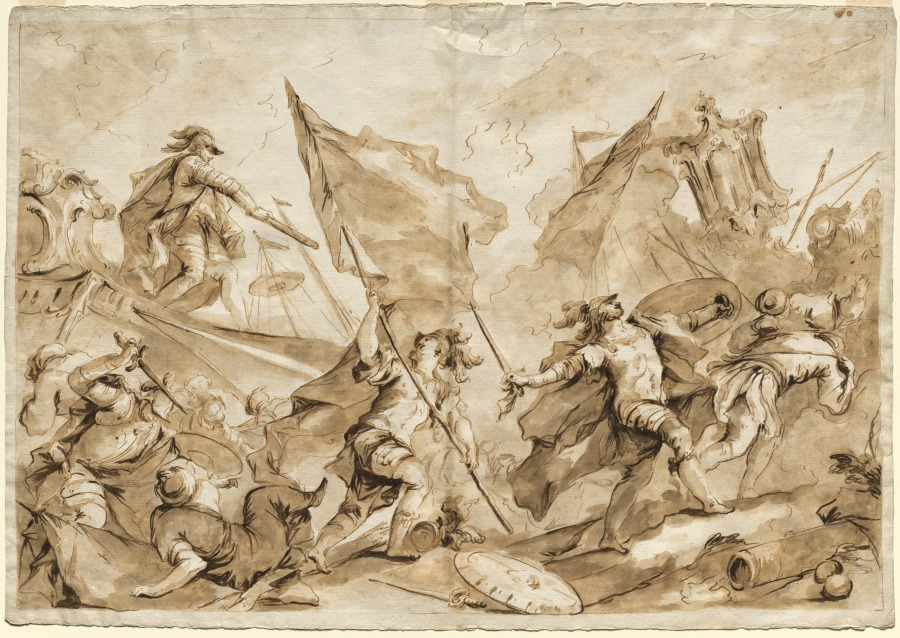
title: Jacopo Marcello Directing the Assault of Gallipoli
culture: Italy, 18th century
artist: Antonio Guardi (Italian, 1699–1760)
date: 1750–60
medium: pen and brown ink and brush and brown wash, over black chalk; framing lines in brown ink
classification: Drawing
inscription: On verso, upper right, in brown ink: "4"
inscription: verso, lower right, in brown ink: "3"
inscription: verso, upper left, typewritten on separately applied piece of paper: "12795 / tlf DRL"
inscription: verso, lower right, in graphite: "75 x 51 1/2"